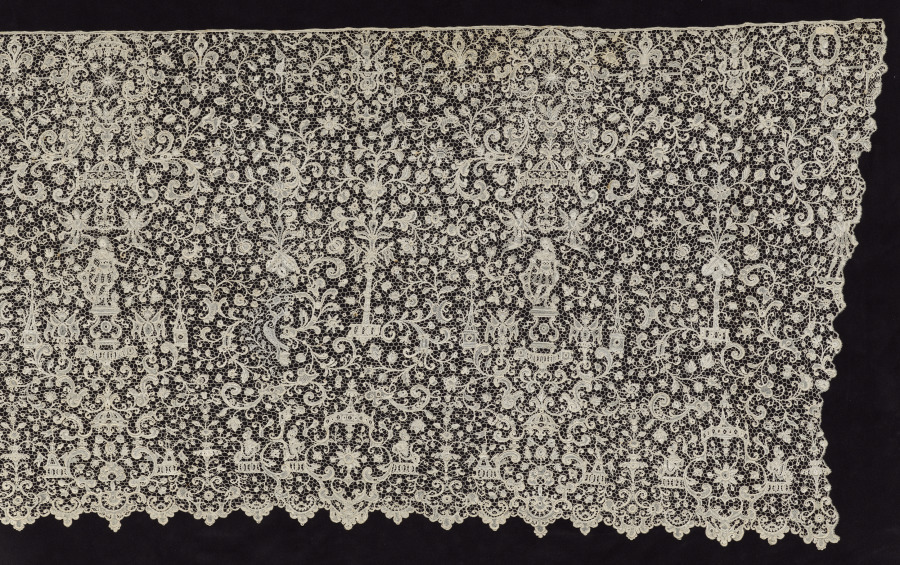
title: Lace Flounce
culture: France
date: 1700–1715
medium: Needle lace (Point de France)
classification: Lace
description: Other pieces of this lace (or ones very similar) are in the Rijksmuseum, Amsterdam; the Isabella Stewart Gardner Museum, Boston; and the Baltimore Museum of Art.